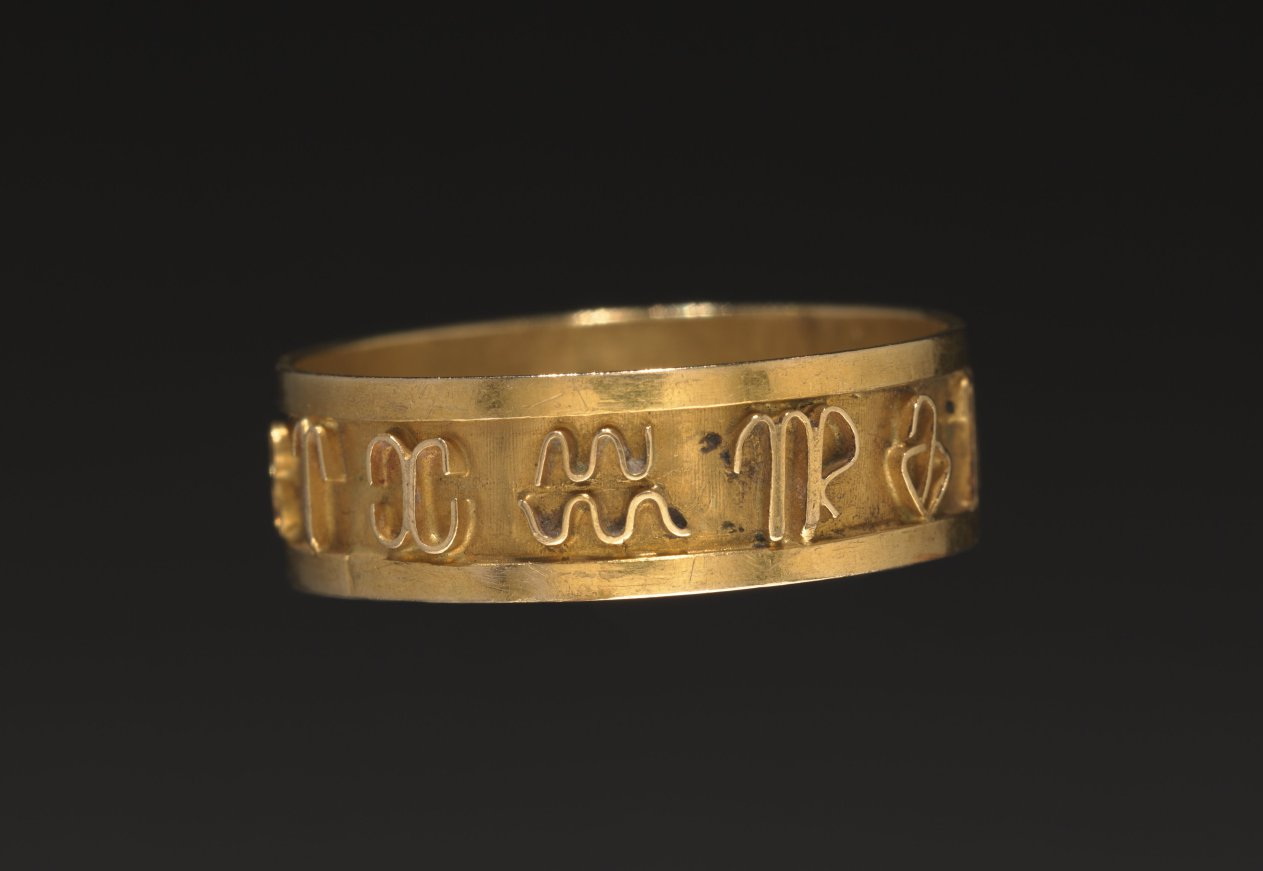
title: Ring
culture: Africa, North Africa, unknown maker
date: 1700s–1800s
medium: Gold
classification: Jewelry